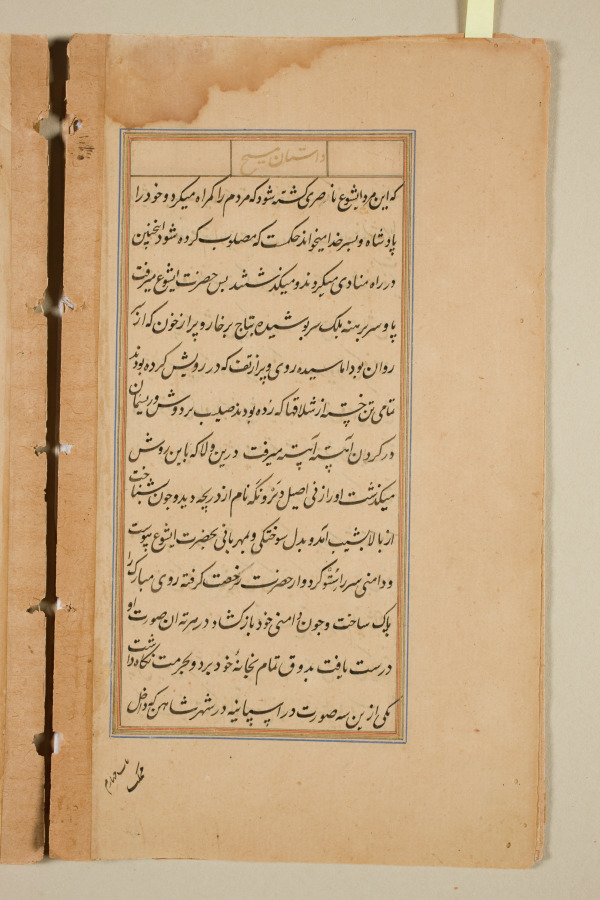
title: Text page from a Mirror of Holiness (Mir’at al-quds) of Father Jerome Xavier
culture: Mughal India, Allahabad, made for Prince Salim (1569–1627)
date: 1602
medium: Ink and gold on paper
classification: Manuscript